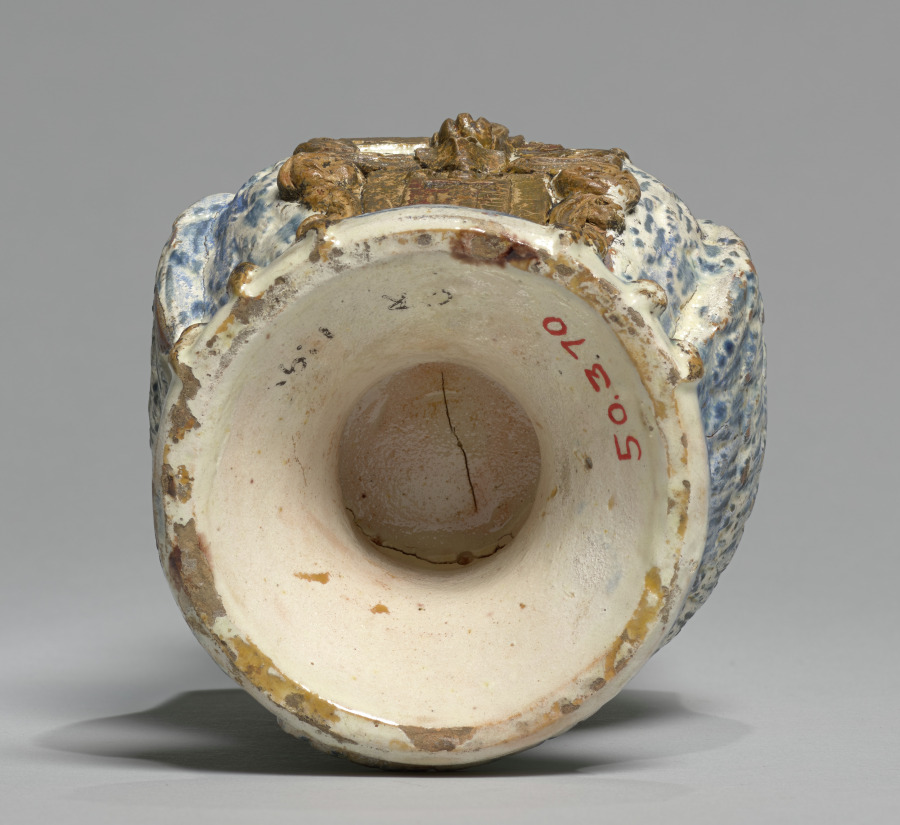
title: Owl (body)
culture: Southern Germany, 16th century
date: 1540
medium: faience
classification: Ceramic